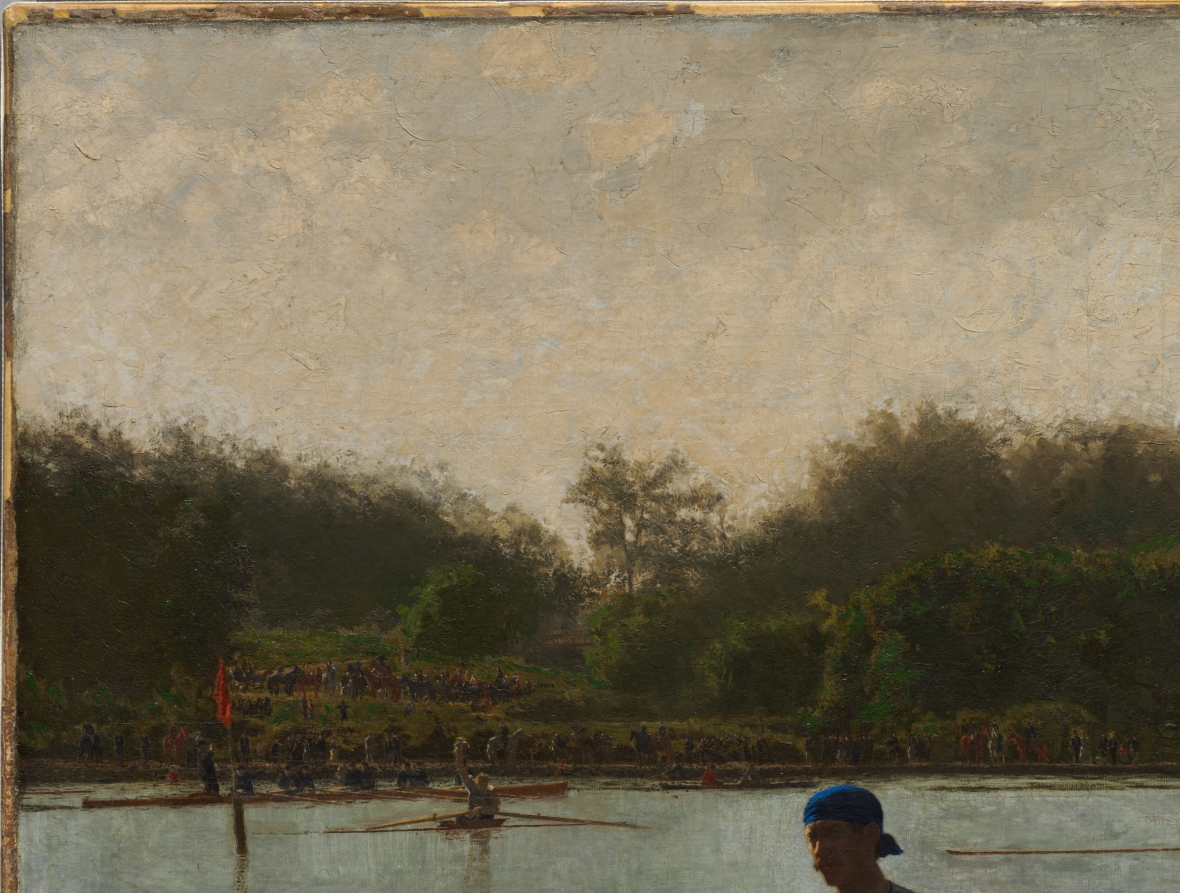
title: The Biglin Brothers Turning the Stake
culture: America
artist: Thomas Eakins (American, 1844–1916)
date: 1873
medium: oil on canvas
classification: Painting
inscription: signed lower left: EAKINS 73.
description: Eakins's painting celebrates athletic teamwork while commemorating an actual event, a famous rowing race that took place on the Schuylkill River in Philadelphia during May 1872. Throngs of spectators line the riverbank and watch as Barney and John Biglin negotiate the tricky turn around a stake marking the halfway point in the contest. Their competitors, seen in the middle distance at the right, lag behind. The Biglin brothers won the race, cementing their status as the most celebrated oarsmen of the era. Trained in the United States and France, Eakins spent almost his entire artistic career in his hometown of Philadelphia. He is renowned for the unsentimental realism in his paintings, whose compositions he developed through painstakingly prepared figure and perspective drawings.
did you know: Rowing was among the most popular spectator sports in the U.S. during the 1870s.